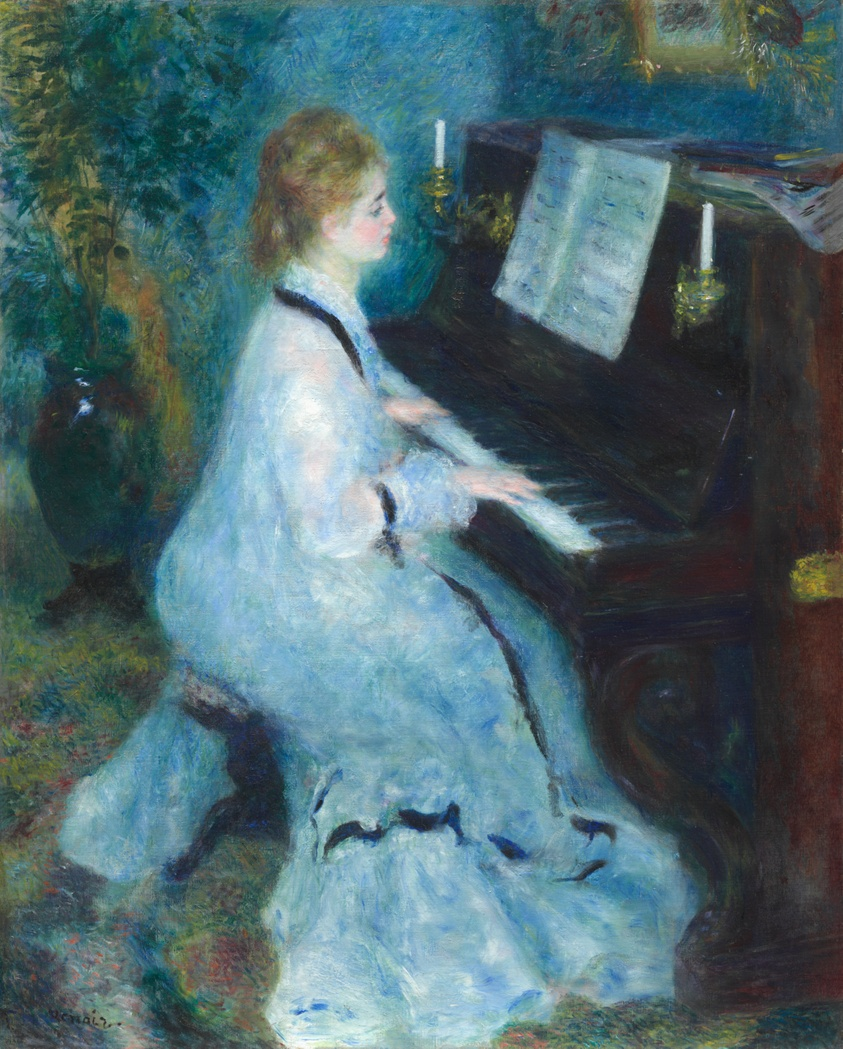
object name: Painting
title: Woman at the Piano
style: Impressionism, nineteenth century, 19th century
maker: Pierre-Auguste Renoir (French, 1841–1919)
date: 1875–76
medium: Oil on canvas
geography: France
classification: oil on canvas; paint; french; portrait; oil paintings (visual works); painting; european painting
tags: pianos, portraits: female subject, portraits, portrait, plants, musical instruments, interior, candleholder, blue (color), blue, leisure, women, music, Century of Progress, world's fairs, Chicago World's Fairs